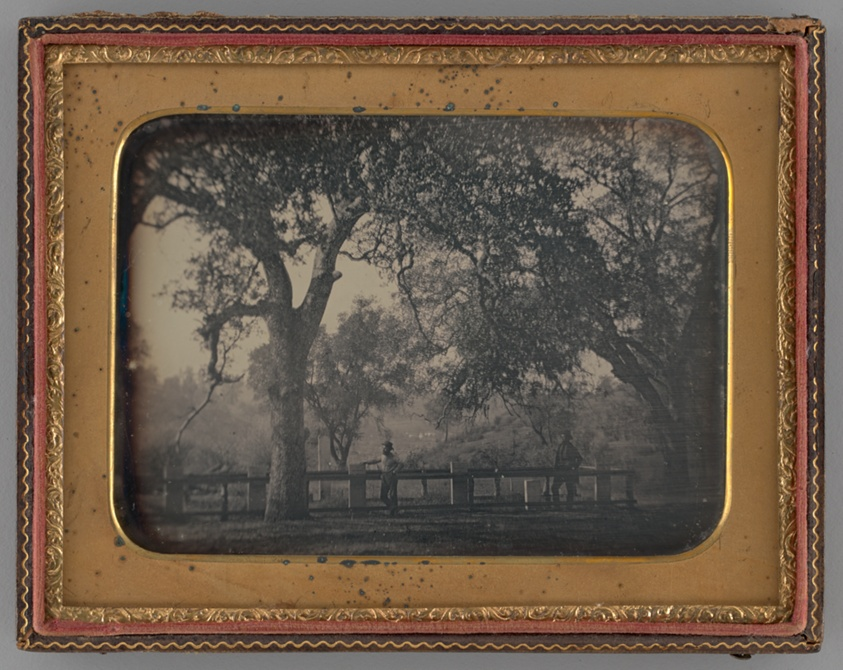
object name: Photograph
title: Untitled (Man Leaning Against a Fence in Front of a Cemetery)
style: 19th century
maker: Unknown maker; American, 19th century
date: 1851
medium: Daguerreotype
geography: United States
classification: portrait; photography; photographic process; photograph; daguerreotype; portrait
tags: lundberg collection, photography, people, men, Male, landscapes, landscape, cemeteries